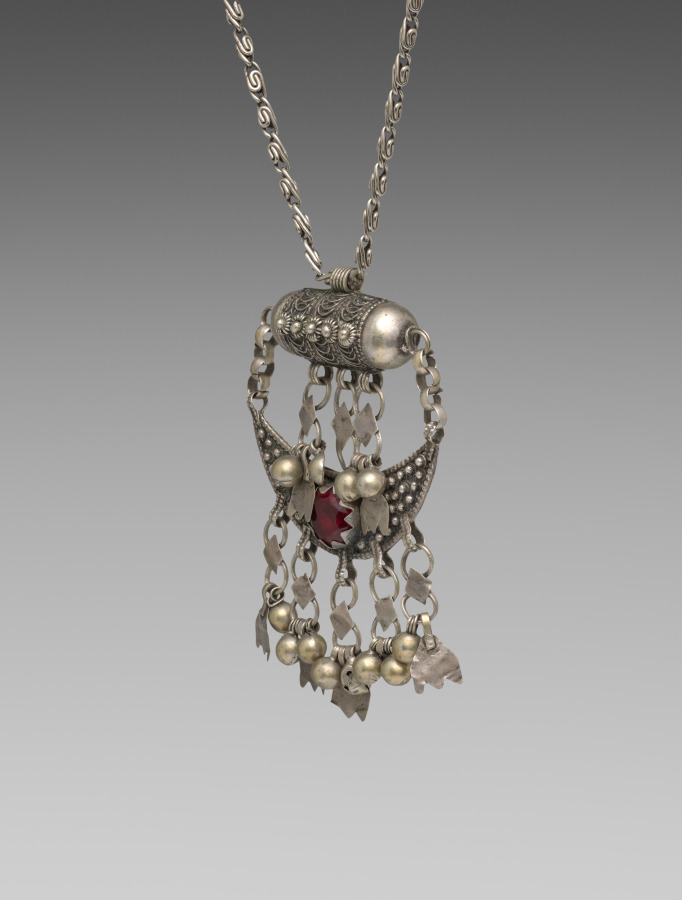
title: Necklace with pendant (waqari or wakari?)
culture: East Africa, probably Harar, Ethiopia, unknown silversmith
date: likely early to mid-1900s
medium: silver alloy, glass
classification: Jewelry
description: Ornate filigree jewelry was historically made in Ethiopia for royals and nobility by specialized silversmiths trained through long apprenticeships. This elaborate pendant necklace (waqari) probably made and worn in the Muslim city of Harar. Muslim women wore such massive jewelry, which holds aesthetic links to nearby Yemen. Its half-moon pendant is a protective crescent shape and its upper filigreed capsule is an amulet. The crescent symbol has existed as a talismanic form in Ethiopia since the Aksumite Empire (1–700s CE).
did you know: Silversmiths also made objects for religious and royal use, like crowns and crosses.